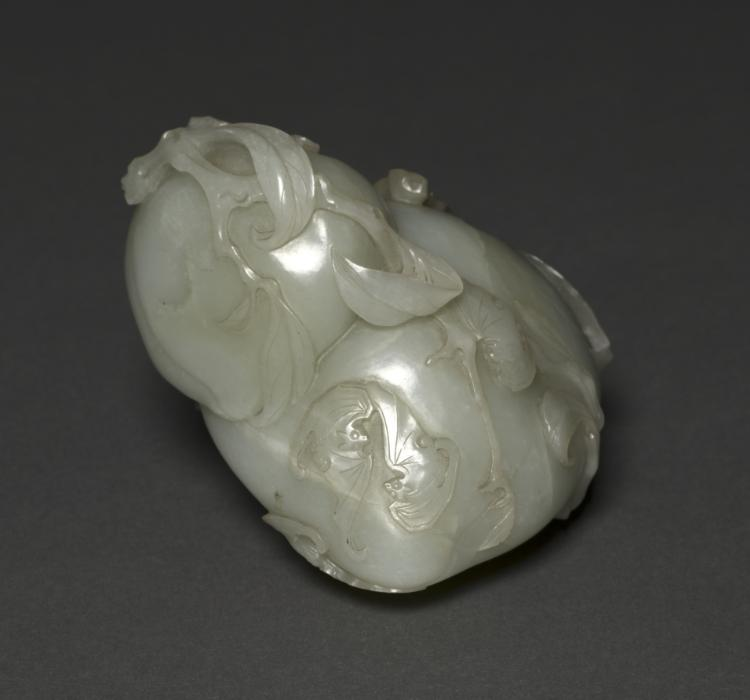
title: Peaches and Bats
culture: China, Qing dynasty (1644–1911)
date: late 1600s–1700s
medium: greenish-white jade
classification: Jade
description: This white jade is carved as a double peach with realistically detailed leaves and branch following the curve of the jade. Clinging to the edge are a pair of bats, which represent good fortune.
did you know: This jade sculpture was given to the museum in memory of John D. Rockefeller and his family.